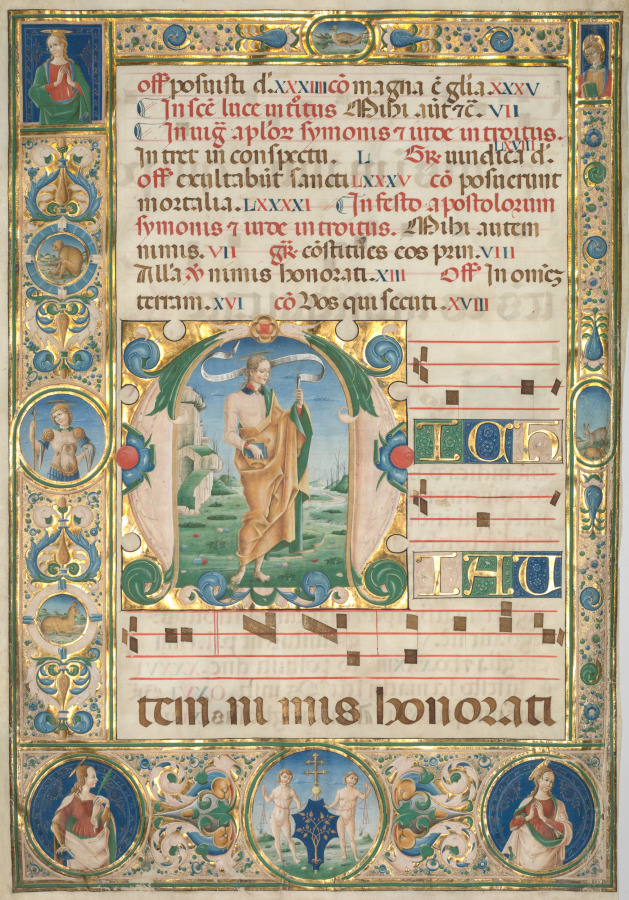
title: Pair of Graduals: Initial (M) with St. Andrew (recto) and Mass for the Dead (recto)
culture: Italy, Ferrara, 15th century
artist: Jacopo Filippo d' Argenta (Italian, 1501)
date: c. 1480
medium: ink, tempera, and gold on parchment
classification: Manuscript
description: This leaf was excised from a volume of a large set of choral books known to have been commissioned by Bartolomeo delle Rovere for Ferrara Cathedral. Delle Rovere, nephew of Pope Sixtus IV, was the Bishop of Ferrara from 1474 to 1494 and his arms appear in the rondel at the bottom of the page-a shield bearing an oak tree (rovere in Italian) surmounted by a patriarchal cross, the symbol of his rank and authority. Payment records indicate that Argenta worked on the choir books for Ferrara Cathedral from 1478 to 1486. The initial M introduces the chant for the Introit (introduction) to the mass for the Feast of Saint Andrew, celebrated on November 30th. This date also marks the beginning of the Advent season (leading to Christmas) in the liturgical calendar.